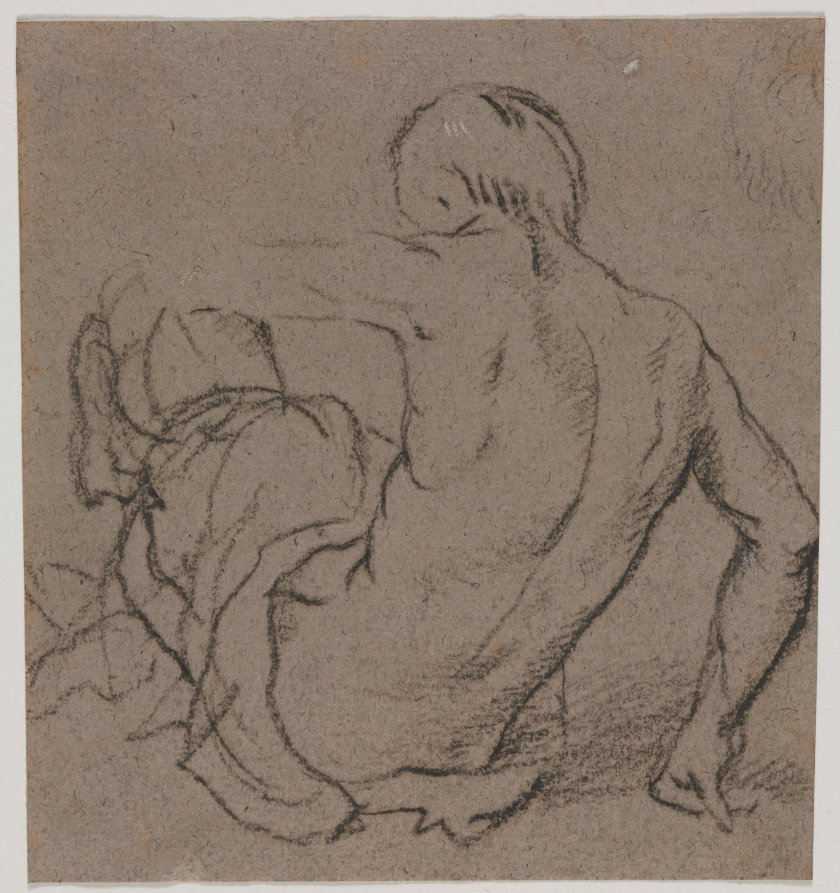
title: Man Seated on the Ground, Seen from Behind (recto)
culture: Italy, 16th century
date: 1500s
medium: brush and black wash heightened with traces of white gouache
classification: Drawing